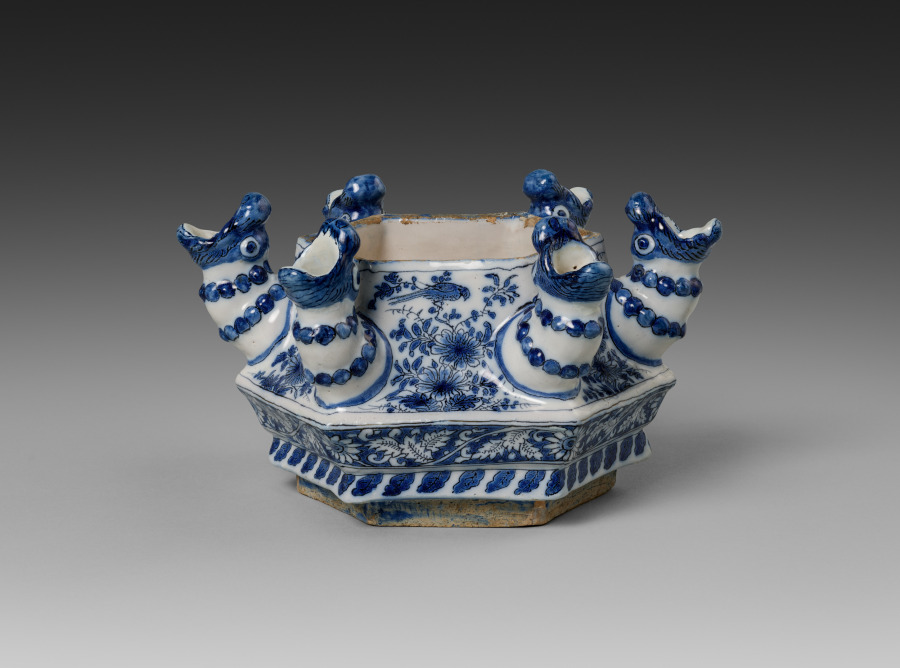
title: Third Tier for a Flower Pyramid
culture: Netherlands, Holland, Delft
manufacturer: Adrianus Kocx (Dutch, active 1686–1701)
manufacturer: De Grieksche A (The Greek A) Factory (Netherlands, 1658–1811)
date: c. 1690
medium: Tin-glazed earthenware, painted in blue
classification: Ceramic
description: Allegorical figures representing Faith, Hope, and Love decorate the base of this pyramid, on which rest six tiers with spouts where flowers can be placed. Flower pyramids are among the most complex and luxurious types of ceramics produced in Delft in the late 1600s. This example was made in the Greek A Factory, owned by Adrianus Kocx. During his tenure, the factory became the most prestigious of Delft potteries and received commissions from Queen Mary II, who ruled over England, Scotland, and Ireland together with her husband, William III. She contributed to the international spread of the fashion for Delft ceramics.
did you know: The iconic blue-and-white ceramics from Delft originated as an attempt to copy Chinese porcelain.